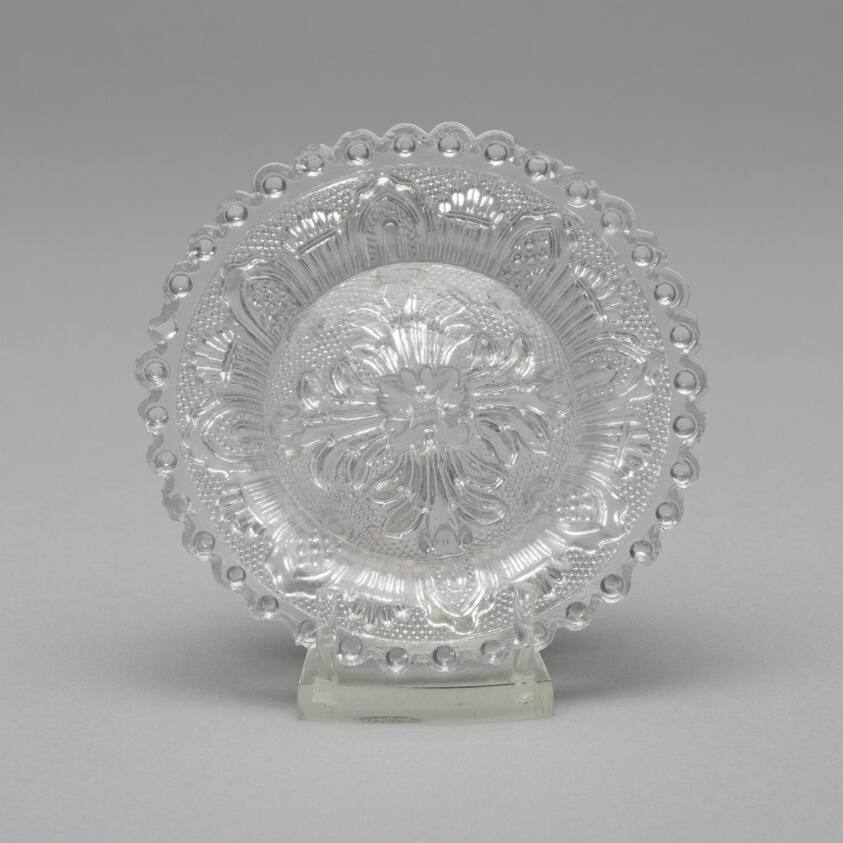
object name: Glass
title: Cup plate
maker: Artist unknown (American, 19th century); Midwest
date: 1830–35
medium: Pressed glass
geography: Midwest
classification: plate (general, dish); glass; american decorative arts; american arts; decorative arts